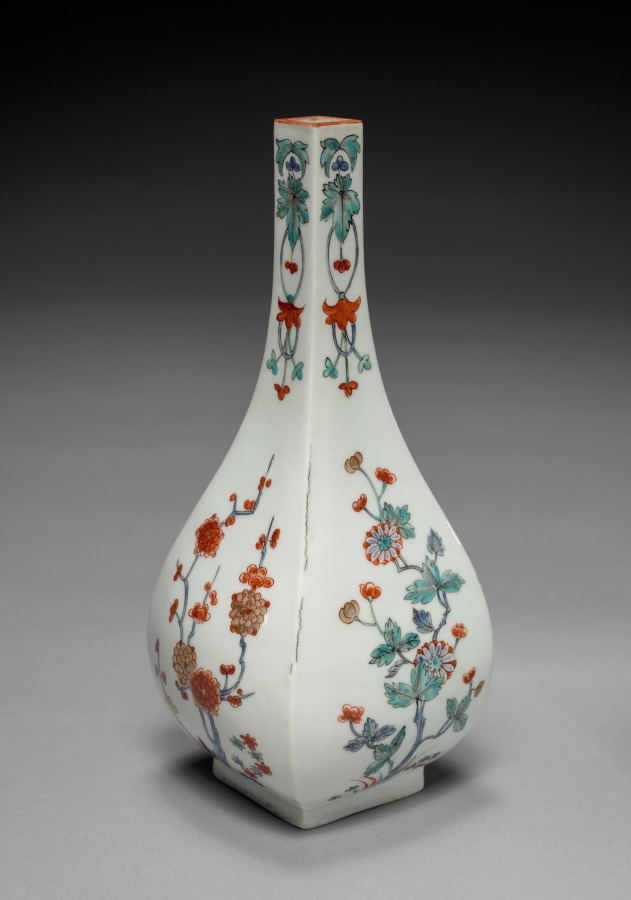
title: Bottle Vase with Plum and Chrysanthemum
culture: Japan, Edo period (1615–1868)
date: late 1600s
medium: porcelain with overglaze color enamel and gold (Hizen ware, Kakiemon type)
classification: Ceramic